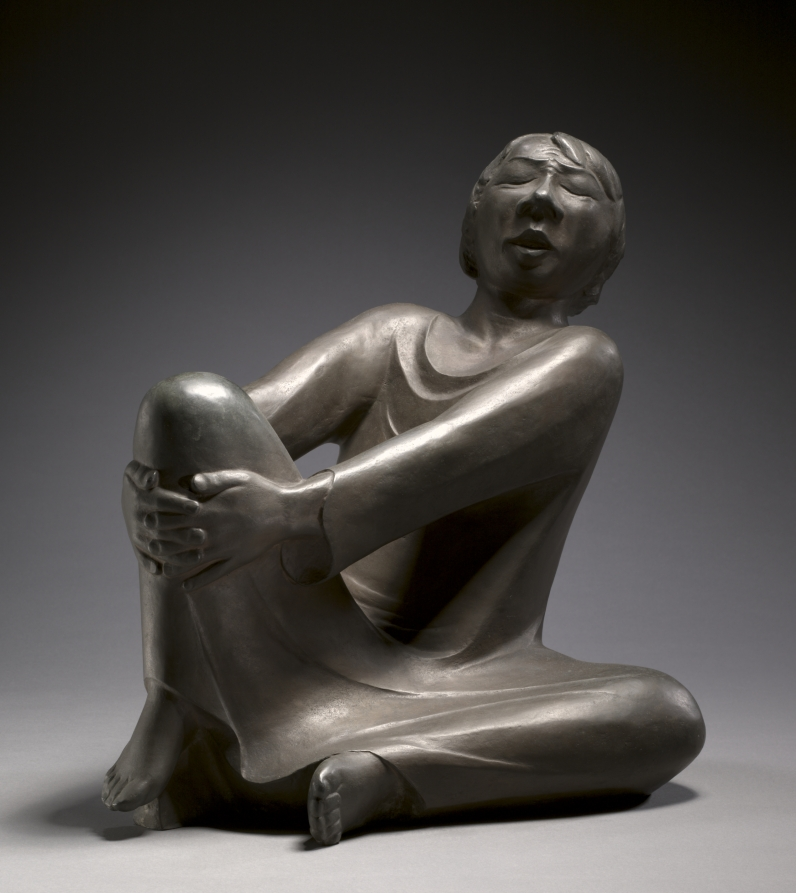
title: Singing Man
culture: Germany, 20th century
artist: Ernst Barlach (German, 1870–1938)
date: 1928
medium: bronze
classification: Sculpture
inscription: Signed on support under right foot: "E. Barlach"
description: One of the most celebrated sculptors of the Expressionist movement in Germany, Barlach first began exploring ways to convey inner feeling through depictions of the human body around 1906. As this singing man pulls his knee toward his body, his closed eyes and open mouth suggest deep concentration. A staunch opponent of the Nazis, Barlach was declared a “degenerate artist” and forbidden to teach or exhibit in Germany.